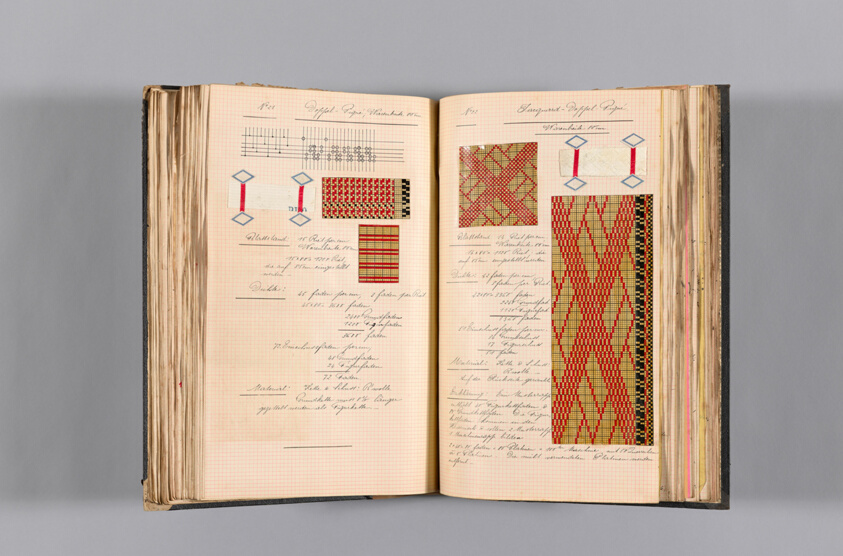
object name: Book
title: Student Notebook Containing Notes, Diagrams and Swatches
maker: Alfred Fehr (Switzerland, 1879-1955)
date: c. 1898–1900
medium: Bound notebook of technical notes and weave samples: fabrics for clothing and mixed goods, ribbed and twill cottons, and jacquard; 176 pages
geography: Germany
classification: book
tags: weaving, diagrams